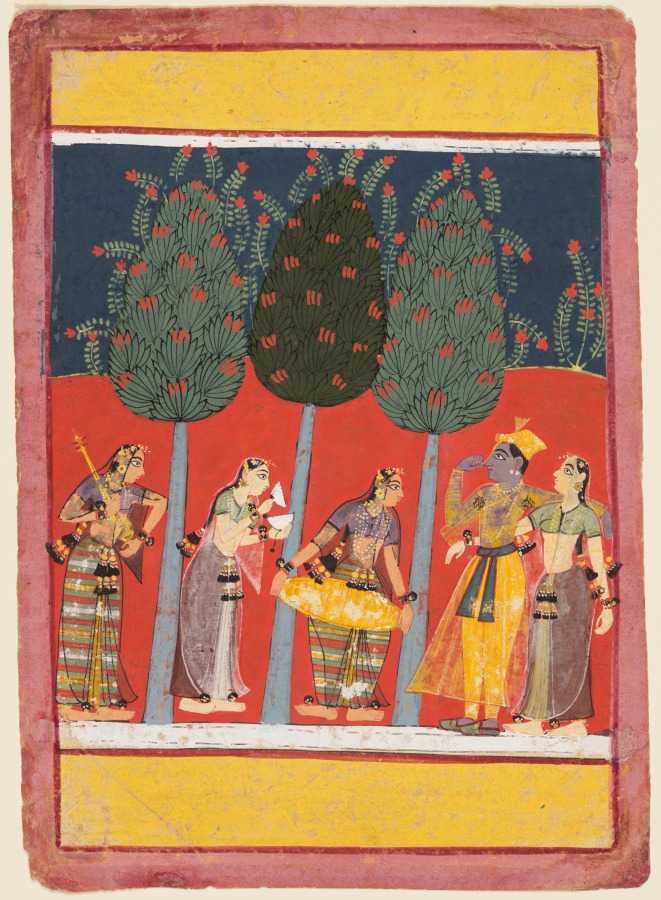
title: Women Play Music for Radha and Krishna: Chitrini Nayika, from a Rasikapriya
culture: Central India, Madhya Pradesh, Malwa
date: c. 1650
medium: gum tempera, ink, and gold on paper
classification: Painting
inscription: nṛta gīta kavitā rucca acala citta cala dṛṣthi viharata rati āti surata jana madhu gaṃdha kī śṛṣthi virala loma tana magana gra bhāvata sakala suvasa mitra citra priya citrinī janahu kesavadasa bolibau bolani kau sunivau avalokani ke savaloka najotai nāchivau gāivau vīnu vajāi vīri-hi rihāivo jānatu totai rāga virāga nike parirambhana hasa vilasa te reta kotai to mili tau hari mitrahi kau sakhi aise caritra jau citra mai hote. 39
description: The idea of aesthetic appreciation as explored by the poet Keshavdas (Indian, 1555–1617) in the excerpt from his Rasikapriya written on the back of this painting is envisioned as the appreciation of music. With their arms around each other, Radha and Krishna enjoy the performance on a stringed instrument (setar), cymbals, and drum in the forest.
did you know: Krishna wears a translucent yellow tunic (jama), tied under the right arm, which is usually the convention for Muslims.